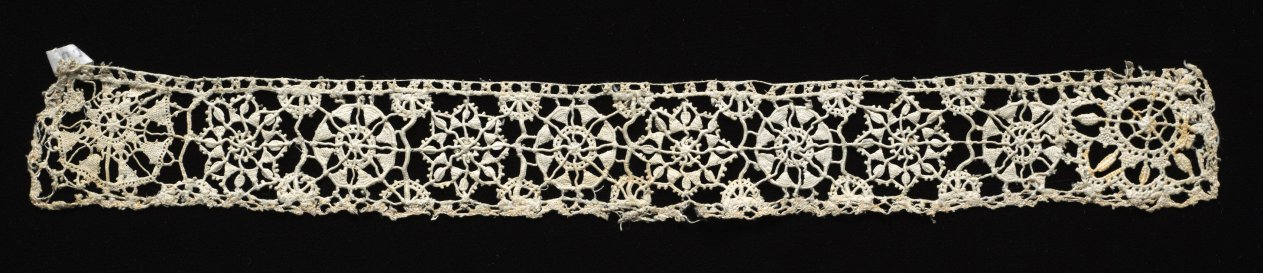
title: Lace Fragment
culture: Italy, Venice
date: 1500s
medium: Linen: needle lace (Reticella) insertion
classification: Lace